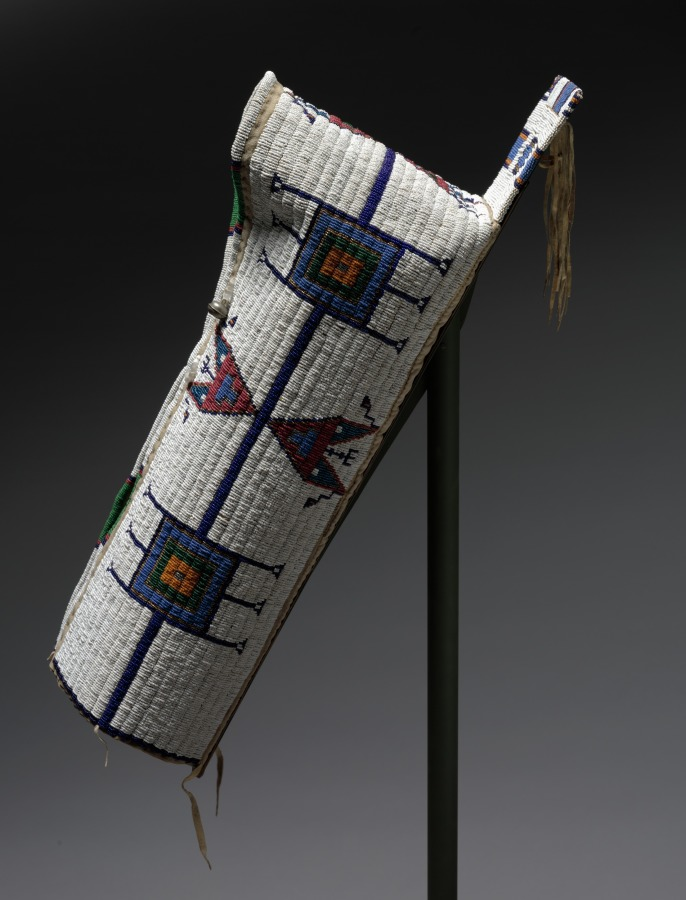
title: Cradle or Baby Carrier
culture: Native North America, Plains, Lakota (Sioux)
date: c. 1900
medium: Native-tanned hide, cotton cloth, glass beads, metal beads, brass bell, sinew thread, cotton thread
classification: Leather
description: Many Plains peoples hold lavishly quilled or beaded cradles in high esteem—they bestow spiritual benefits on the infant and prestige and honor on the family and the maker, usually a female relative. Indeed, today and in the past, creating such a cradle is often regarded as equal to counting coup, the ultimate act of male bravery in which a warrior touches an enemy with a stick known as a coup stick. This cradle was held in the arms; others have wooden frames that can be propped against a support, such as a sofa or a tree, to ease the baby’s socialization into the community.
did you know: In the past, young Plains children spent much of their time in cradles, which remain in occasional use today.